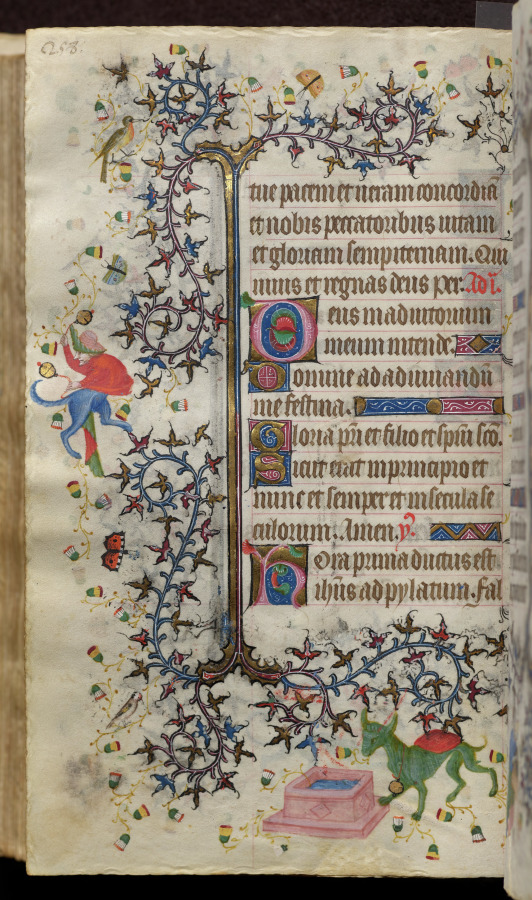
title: Hours of Charles the Noble, King of Navarre (1361-1425): fol. 129v, Text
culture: France, Paris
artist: Master of the Brussels Initials and Associates (French)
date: c. 1405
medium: ink, tempera, and gold on vellum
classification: Bound Volume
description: This precious volume was obviously highly prized by its owner, the French-born King of Navarre, who had his coat of arms painted on no less than twenty folios. Rather than directly commissioning this manuscript from a specific workshop, it seems that Charles the Noble acquired his book of hours -- perhaps ready-made for the luxury market -- while on a trip to Paris in 1404-05. A collaborative effort, six painting styles are evidenced within the pages of this codex, those of two Italians, two Frenchmen, and two Netherlanders. The painter who was responsible for the planning and decoration of the book, and who produced seventeen of the large miniatures, was a Bolognese artist known as the Master of the Brussels Initials. His principal assistant, responsible for most of the borders, was a Florentine who signed his name "Zecho" da Firenze on folio 208 verso.